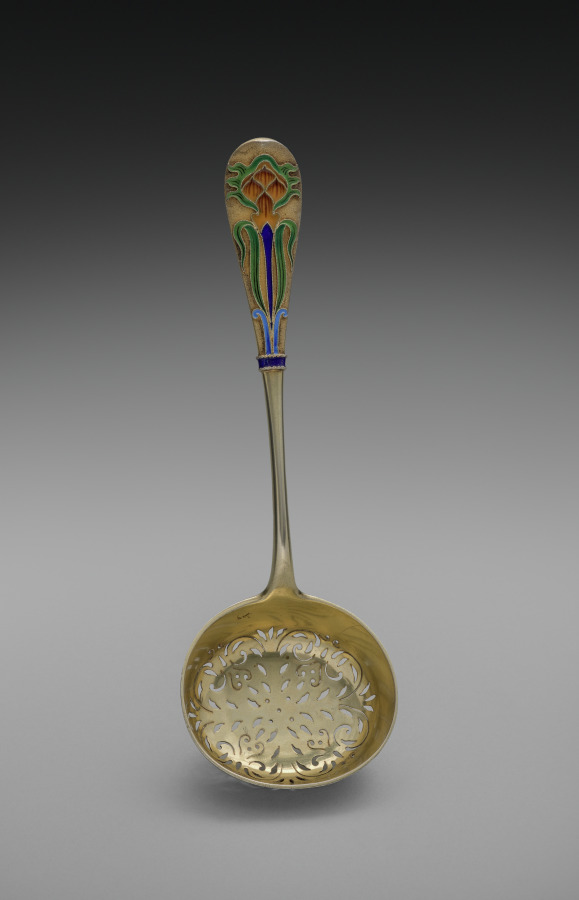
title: Jam (Varenye) Sifter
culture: Russia, St. Petersburg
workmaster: attributed to Feodor Ivanovich Rückert (Russian, 1840–1917)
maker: House of Fabergé (Russian, 1842–1918)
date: 1887–96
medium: silver gilt, opaque cloisonné enamel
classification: Miscellaneous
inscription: 84, St. George? [assay mark for Moscow, 1882-1896]; C. Fabergé (in Cyrillic); double-headed eagle? [imperial warrant].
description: This sifter, which accompanies the little basket in this tea set, is a particularly Russian component of this service meant to strain the fruit preserved in a sweet juice, called varenye. At Russian tea, varenye was strained and served over cakes or biscuits in a similar way that the English take jam with scones at high tea.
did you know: This jam (varenye) sifter is part of a larger tea service.